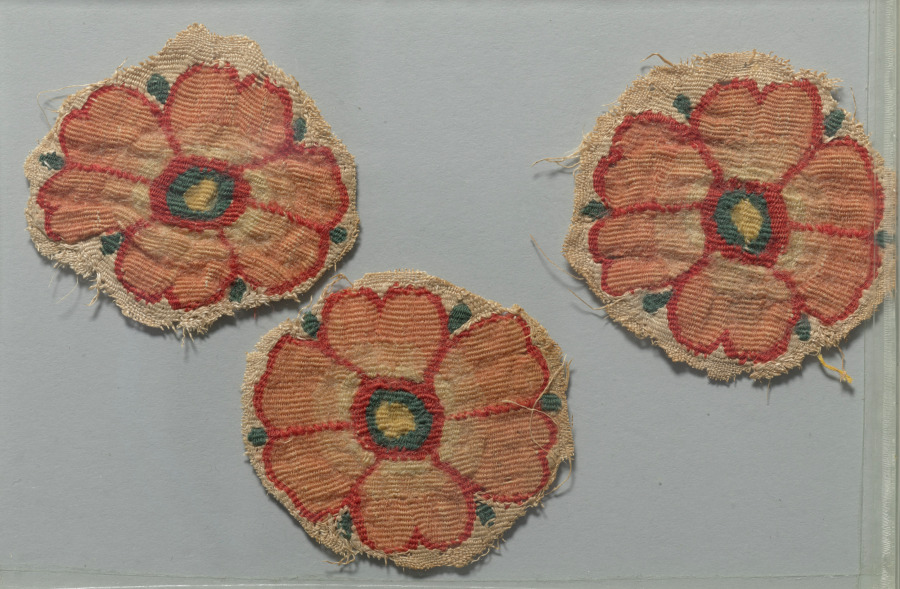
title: Fragments from a Curtain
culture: Egypt, Byzantine period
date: 300s–500s CE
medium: tapestry (originally inwoven in tabby ground, applied to plain tabby linen); linen and wool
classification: Textile